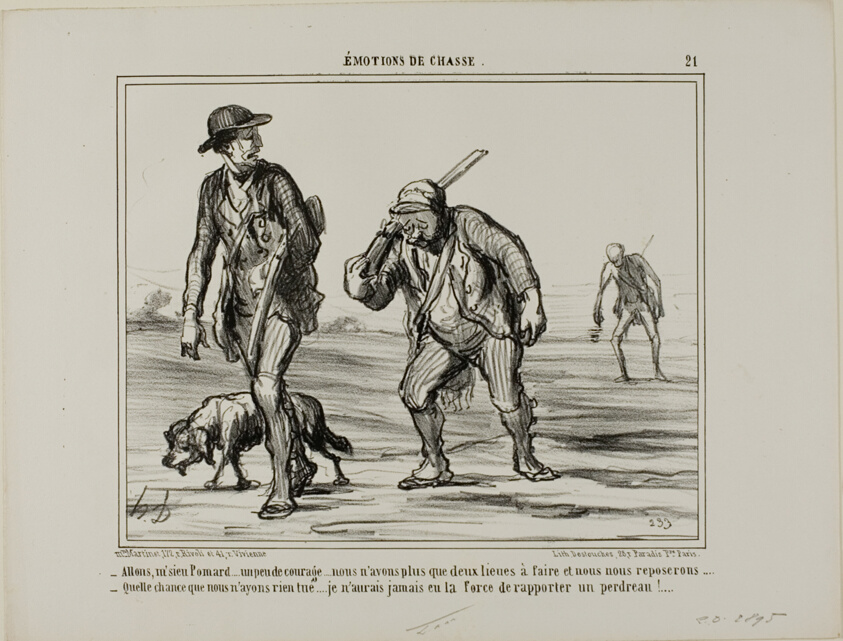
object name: Print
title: “- Come, come, Mr. Pomard... keep your spirits up... only two more leagues and we can rest... - What a piece of luck, we didn't bag anything... I wouldn't even have the strength to carry a partridge,” plate 21 from Émotions De Chasse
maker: Honoré Victorin Daumier; French, 1808-1879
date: 1858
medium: Lithograph in black on white wove paper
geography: France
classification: lithograph; print; prints and drawing